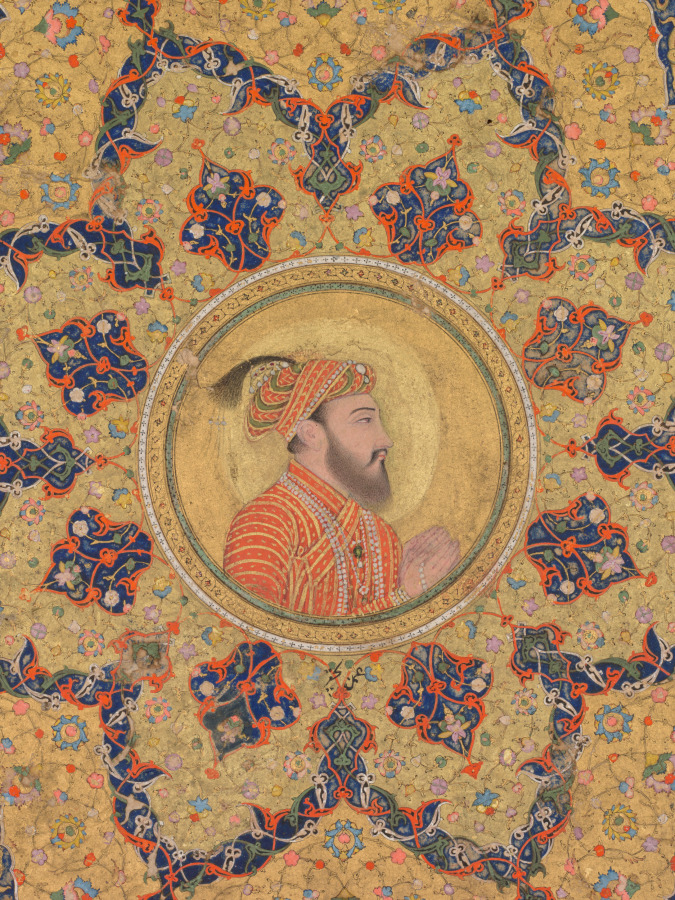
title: Shamsa (sunburst) with portrait of Aurangzeb (1618–1707), from the Emperor's Album (the Kevorkian Album)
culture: India, Mughal court, made for Shah Jahan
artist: probably by Bichitr (Indian, active c. 1615–50)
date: illumination 1640–55; original portrait c. 1640–50; altered after 1658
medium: Gum tempera and gold on paper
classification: Painting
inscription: inscribed below Shamsa: Padshah Jahan; inscribed below portrait : 'amal-i Bichitr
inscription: Persian inscription below shamsa (sunburst), in nasta‘liq script: Great King Shah Jahan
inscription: Persian inscription below portrait, in nasta‘liq script: the work of Bichitr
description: This closing page of an imperial Mughal album originally had the shamsa, or sunburst, with a plain gold disc in the center, referencing the light of God as divine sanction for Emperor Shah Jahan’s rule. The depiction of divine light by means of floral and geometric patterns was painted by hand with mathematical precision in gold and lapis lazuli. The portrait of Aurangzeb was probably added when he took over the imperial library after seizing the throne from his father, Shah Jahan, in 1658 and adopting the name Alamgir, which means “Seizer of the Universe.” The string of prayer beads in his right hand points to his extreme religious orthodoxy, which dramatically altered the culture of the Mughal court from what had previously been an openly ecumenical center.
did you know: Tooling the gold cloud motif with pinpricks makes it catch more light and shimmer.